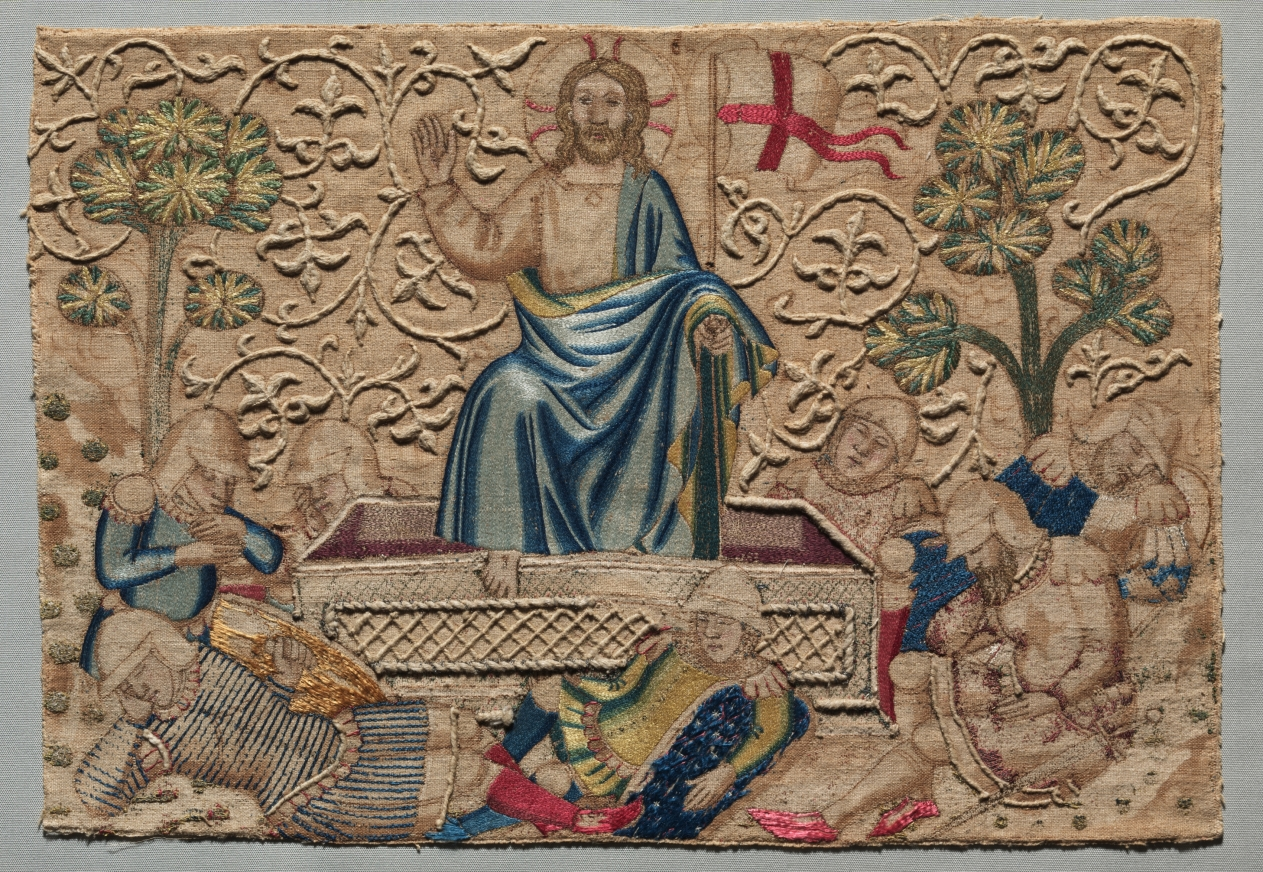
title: The Resurrection, from an Altar Frontal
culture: Italy, Florence, 14th century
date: 1375–1400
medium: Silk, gold and cotton thread, linen; raised work, embroidery: split, stem, and couching stitches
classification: Embroidery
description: This scene of the Resurrection, along with 11 additional embroideries of the life of Christ, may have formed an altar frontal, a hanging decorating the front of an altar. Originally, expensive gold thread covered the background, but it was removed and probably melted down for its monetary value. The loss of the gold exposes a rarely seen preparatory drawing on the linen ground created by an unidentified painter. Now exposed, thick cotton thread forms scrolling vines that, when covered with radiant gold thread, would have paralleled the effect of raised plaster decoration in paintings. What does survive is of the highest quality and refinement, including more than 20 brilliant shades of silk thread.